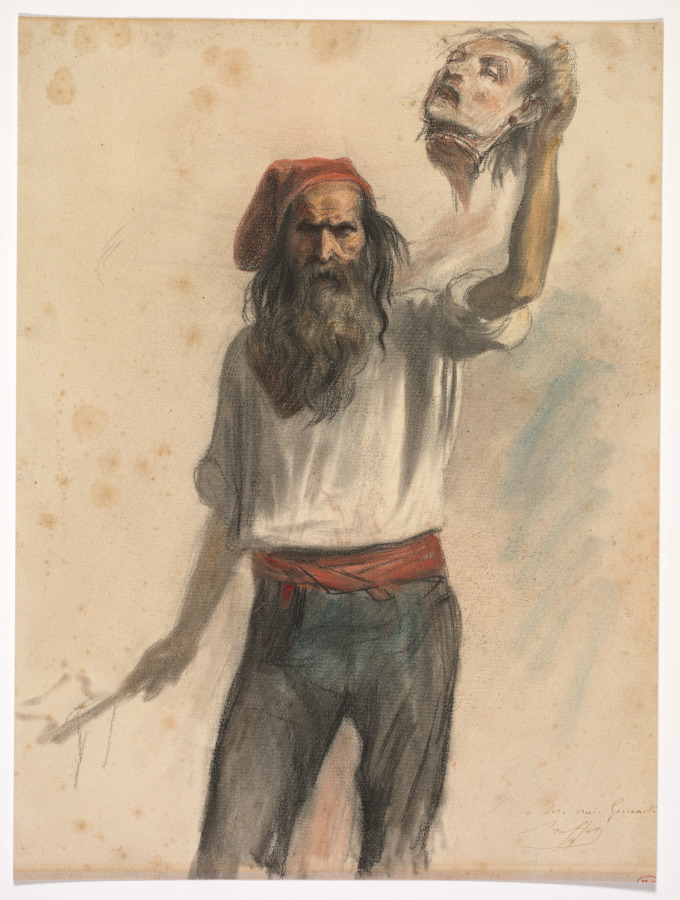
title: Un Borreau (An Executioner)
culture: France, 19th century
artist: Auguste Raffet (French, 1804–1860)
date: c. 1848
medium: Watercolor, gouache and black chalk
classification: Drawing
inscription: lower right, in brown ink: a mon ami Giacomelli / Raffet